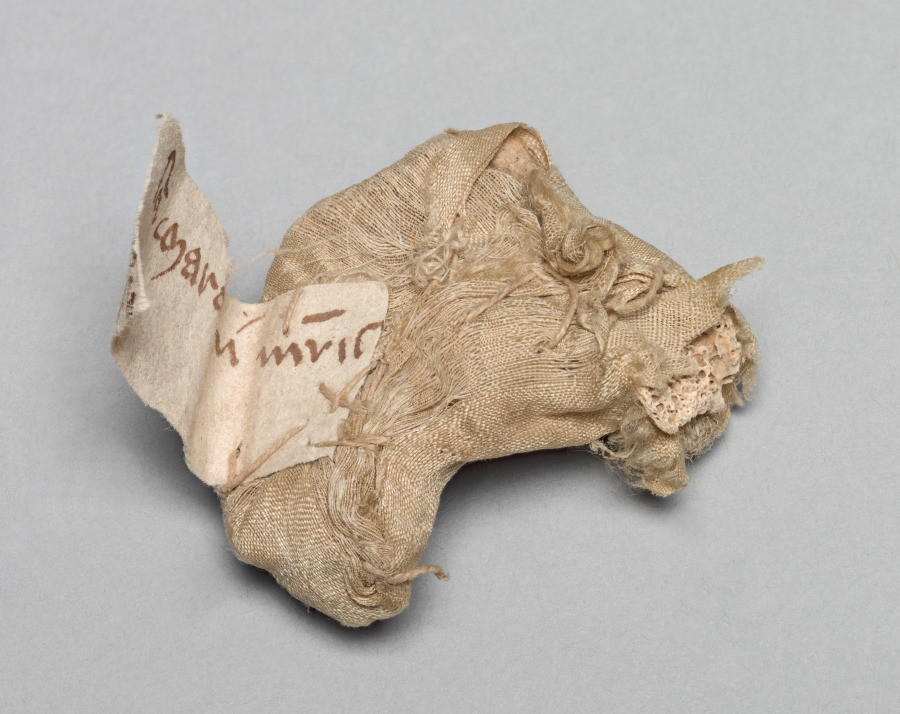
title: Relic of St. Vincent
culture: Germany, Lower Saxony?, Romanesque period, 11th century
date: c. 1045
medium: bone, plain weave undyed silk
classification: Metalwork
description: This relic is housed in the portable altar commissioned by Countess Gertrude of Brunswick, one of the Guelph Treasure’s earliest and most sumptuous objects.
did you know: This bone is a portion of the occipital bone, where the spinal cord connects to the brain.